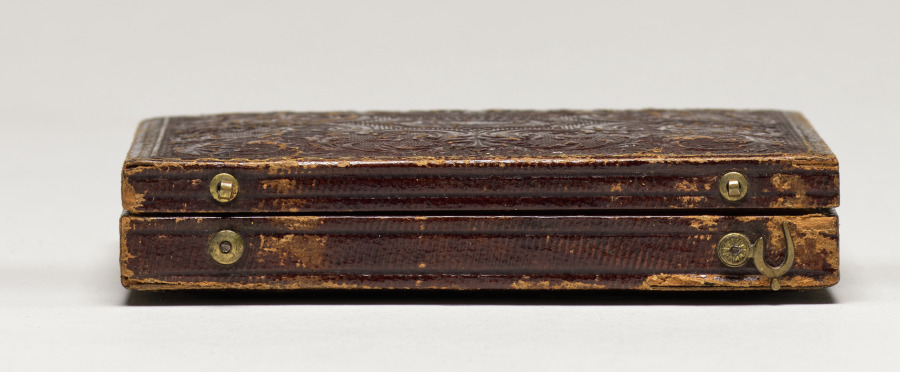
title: Post-Mortem on Pillow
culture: America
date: c. 1855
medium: ambrotype, tinted, sixth plate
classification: Photograph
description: Children have always been particularly cherished subjects for photography. Portraits were made to preserve the memory of their stages of growth and, in an age when long-distance travel was rare, to share with faraway relatives. And, for a sadder reason: in 1840 an estimated one-third of children died before age five. Photography offered grieving parents the opportunity to immortalize their children’s features. This tragic genre of photographs, later called “post-mortems,” often depicts the children in fine clothing, laying down with eyes shut, as if merely napping.